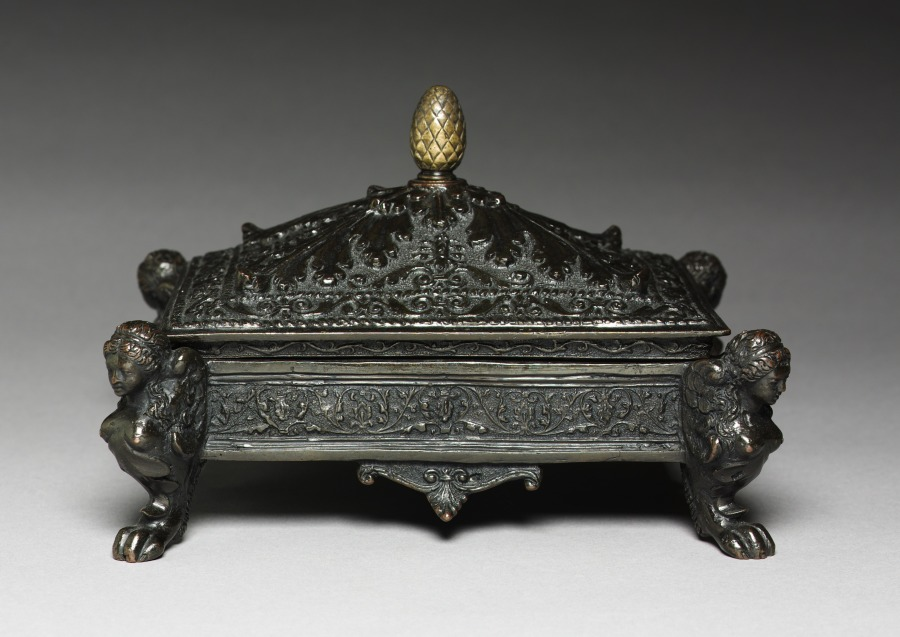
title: Writing Casket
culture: Italy, Ravenna, 16th century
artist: workshop of Severo da Ravenna (Italian, c.1496–c.1543)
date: c. 1525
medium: bronze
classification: Sculpture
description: The interior is divided into four compartments for storing writing implements and sand for blotting.